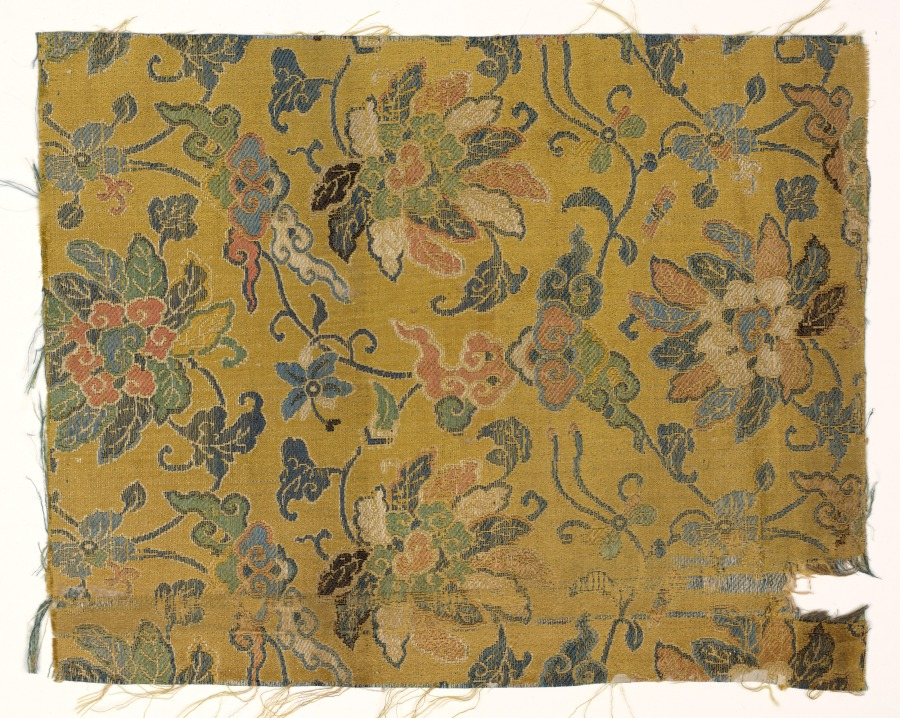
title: Fragment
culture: China, 18th century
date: 1700s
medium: satin ground; silk diasper weave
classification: Textile